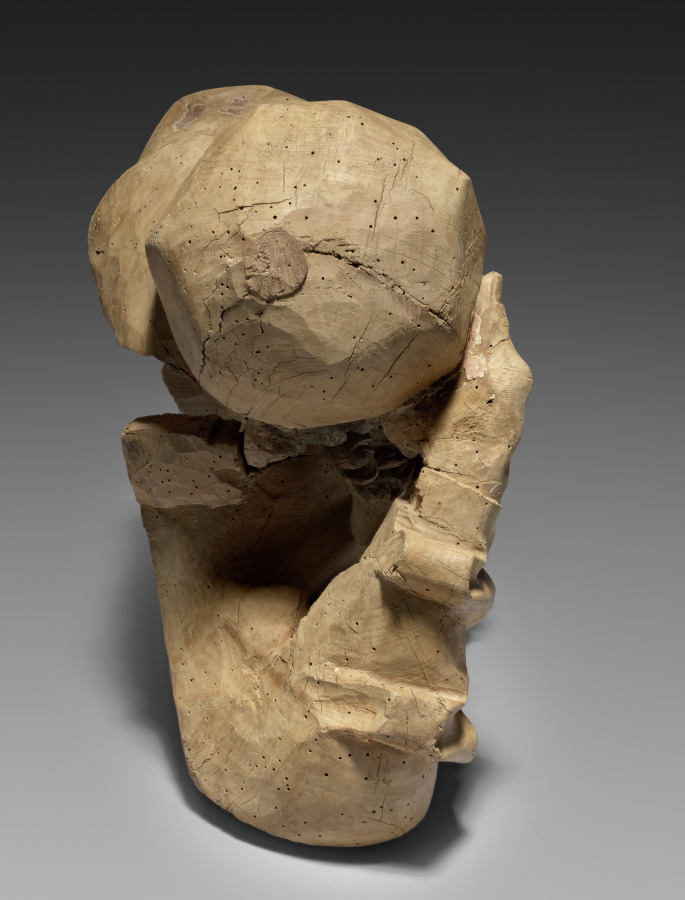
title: Jesse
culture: Germany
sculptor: Veit Stoss (German, c. 1445–1533)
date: c. 1500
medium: Limewood, polychromed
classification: Sculpture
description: The figure shows the sleeping Jesse, the father of David from the Old Testament. As the ancestor of the family tree of Christ, he was depicted in the Middle Ages sleeping as the starting point of the tree, on whose branches the ancestors of Christ are depicted. Mary with the Christ child is always shown at the top. The figure comes from a wooden altarpiece from an unknown church, possibly in Nuremberg, which is now lost. Veit Stoss is one of the most prominent German sculptors around 1500 who was mainly active in Nuremberg (Bavaria, Germany) and Krakow (Poland), also as a painter and engraver.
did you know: The family tree of Christ starts from Jesse, the father of David in the Old Testament.